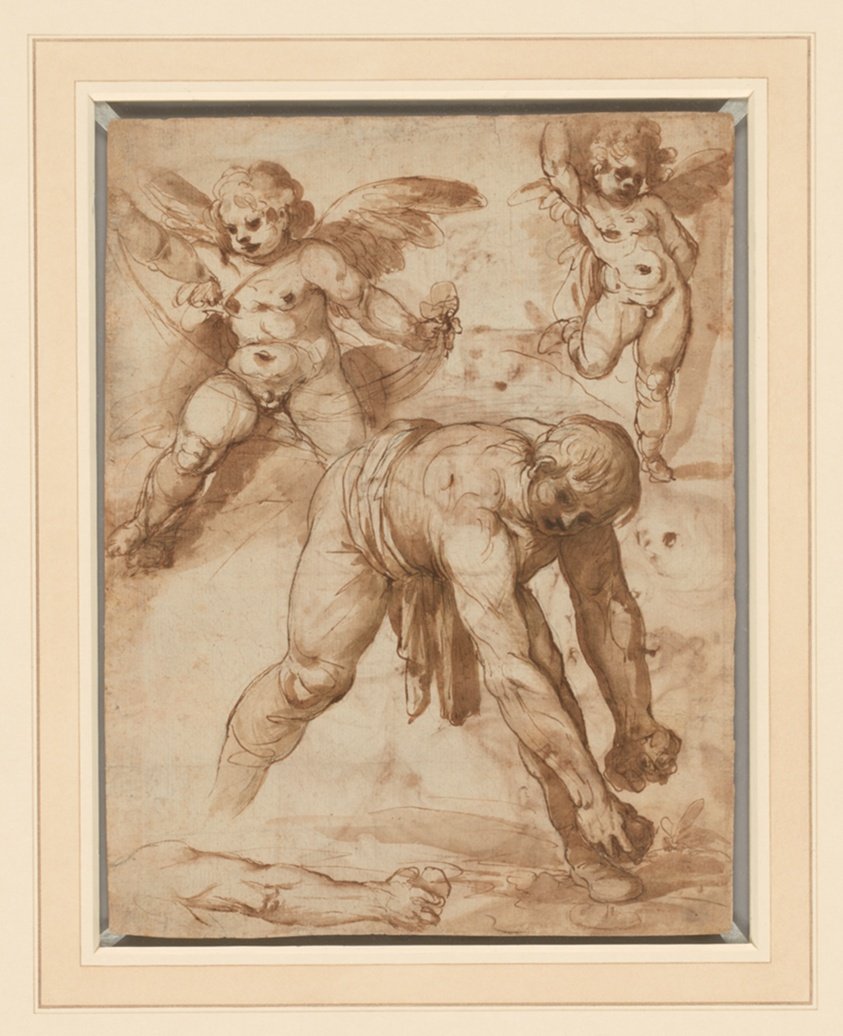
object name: Drawing and Watercolor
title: Studies of a Figure Bending Over, Two Putti, and an Arm (recto); Rest on the Flight into Egypt (verso)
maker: Cesare Rossetti (Italian, active c. 1593–1623/42)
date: 1596/97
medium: Pen and brown iron-gall ink, with brush and brown wash, over black chalk (recto), and pen and brown iron-gall ink, with brush and brown wash, over touches of black chalk, heightened with lead white gouache (partially oxidized) (verso), on ivory laid paper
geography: Italy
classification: drawings (visual works); paper; prints and drawing